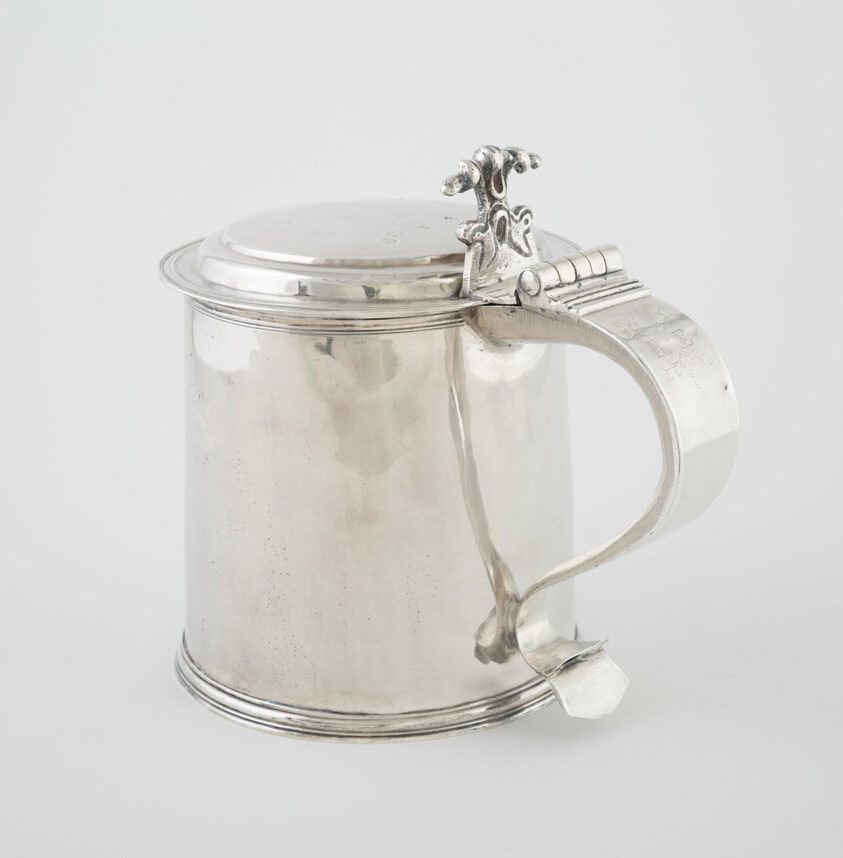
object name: Metalwork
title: Tankard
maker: London, England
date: 1680/81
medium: Silver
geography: London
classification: drinking vessel; silver; metalwork; european decorative arts